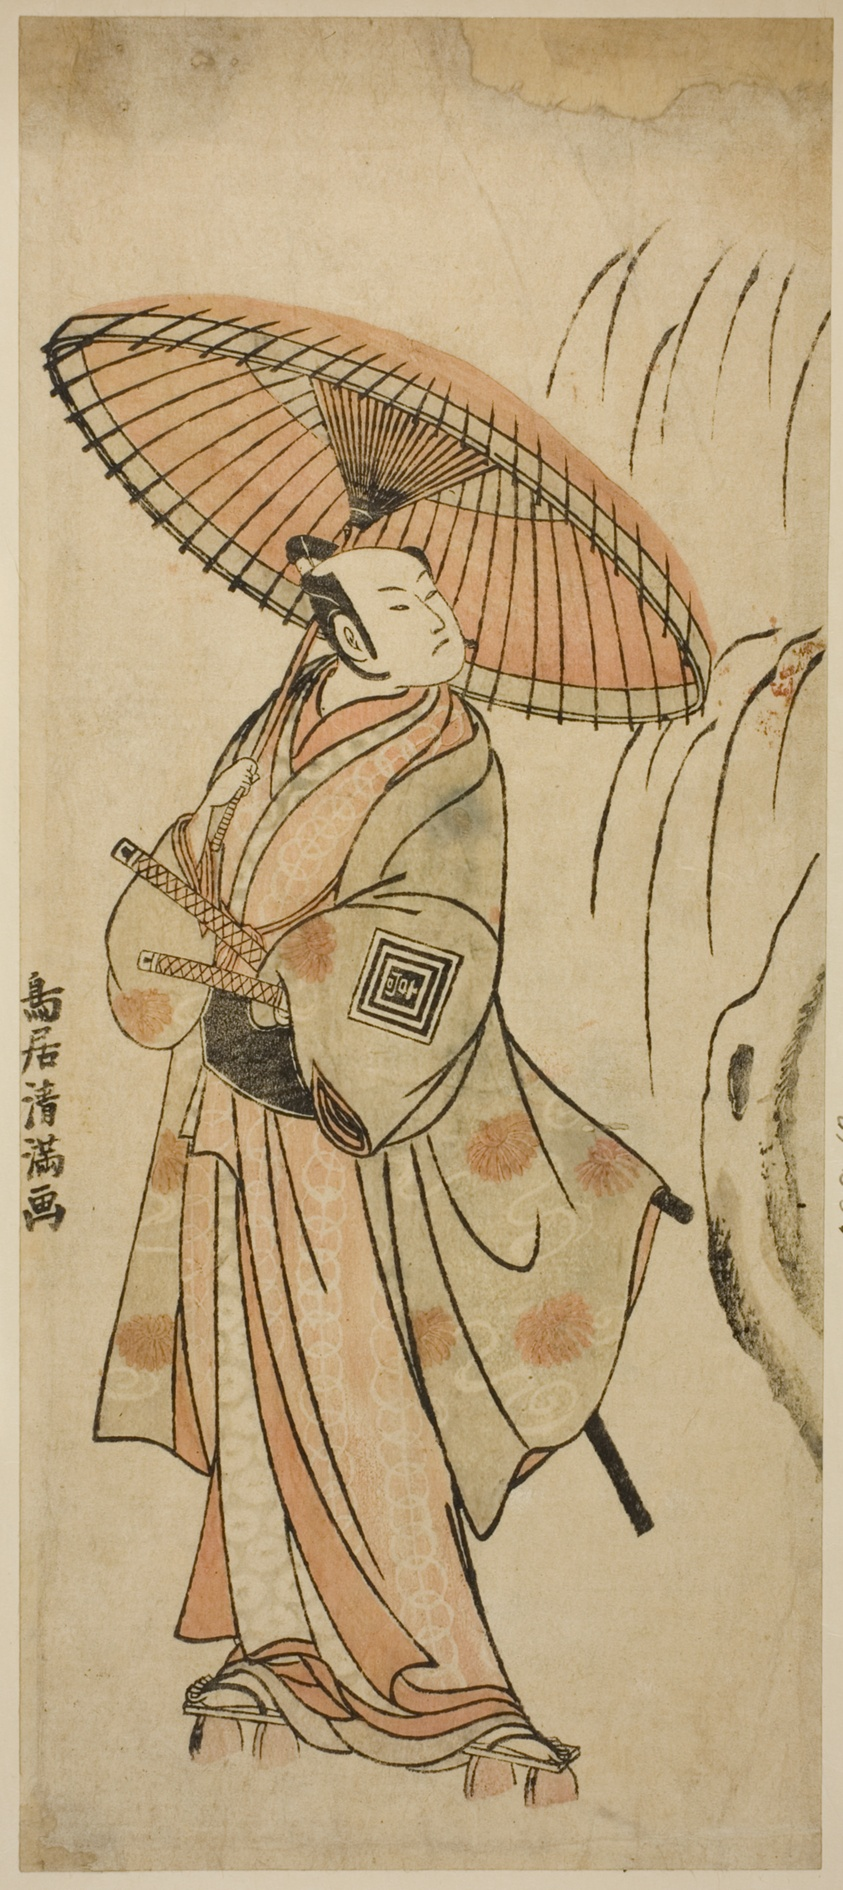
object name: Print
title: The Actor Ichikawa Komazo II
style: Japanese (culture or style)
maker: Torii Kiyomitsu I (Japanese, 1735–1785)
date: c. 1768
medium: Color woodblock print; hosoban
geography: Japan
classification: woodblock print; print; asian art